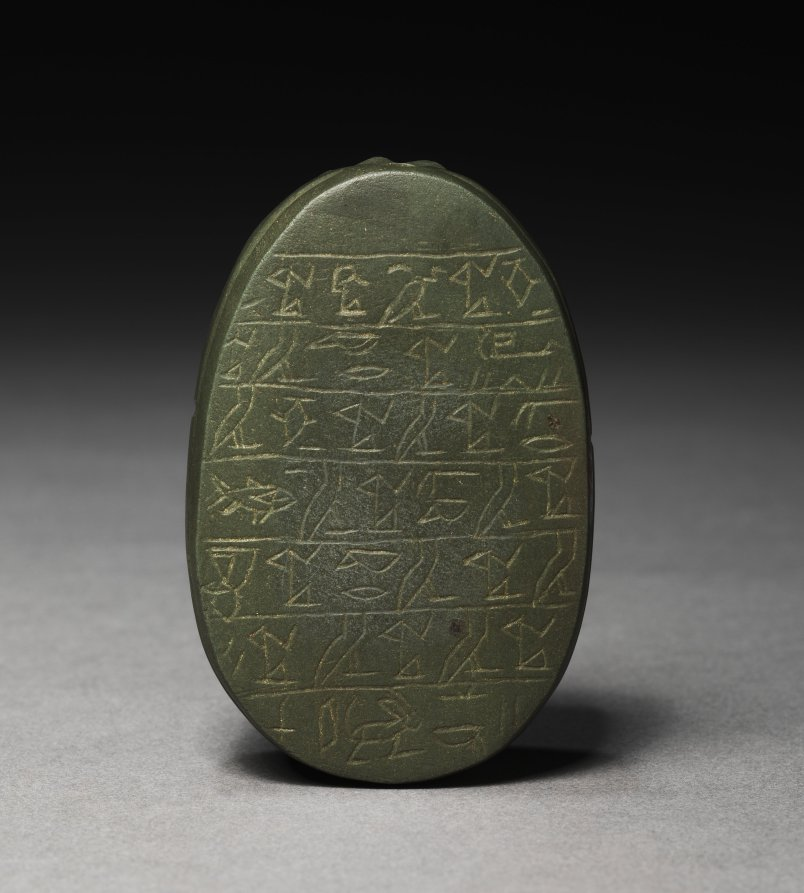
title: Heart Scarab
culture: Egypt, Probably a modern forgery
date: 1900–1913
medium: graywacke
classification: Forgery